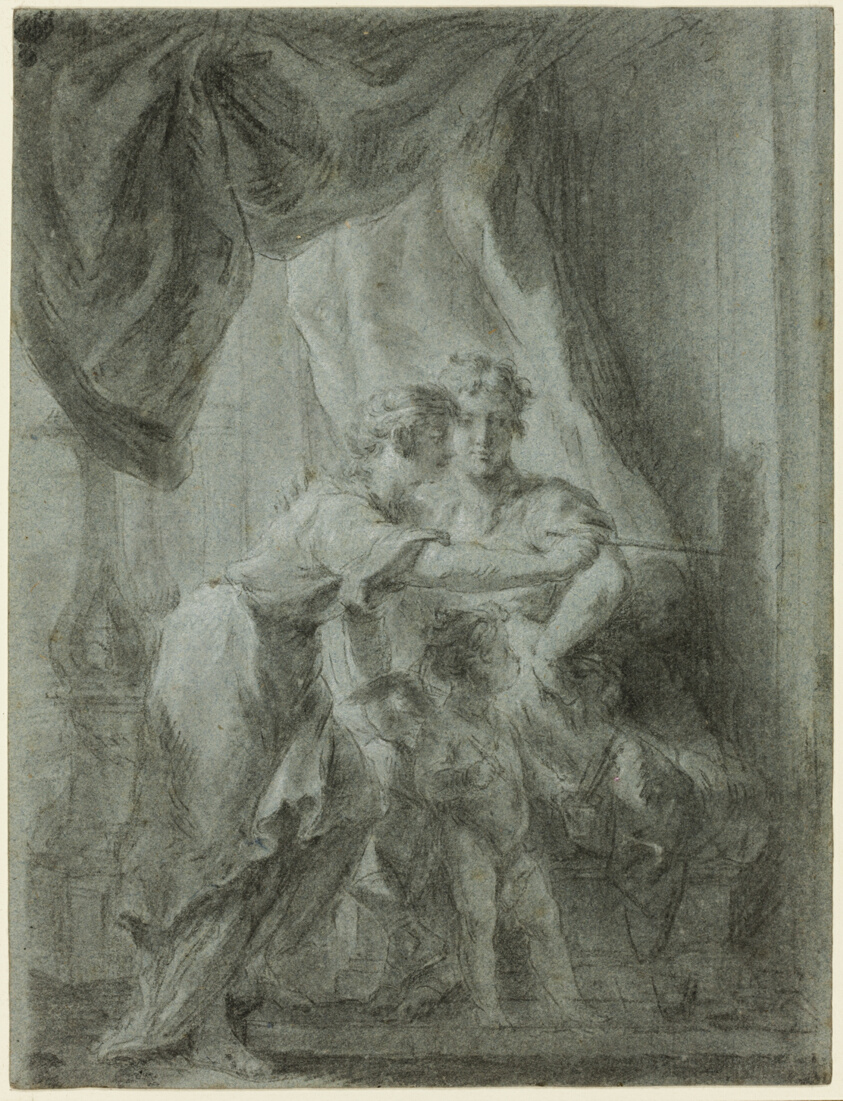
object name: Drawing and Watercolor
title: Mars, Venus and Cupid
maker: Unknown artist; French, 18th century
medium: Black chalk, with stumping, heightened with white chalk, on blue laid paper with blue fibers, laid down on ivory laid paper, edge mounted on cream card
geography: France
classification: chalk; drawings (visual works); prints and drawing